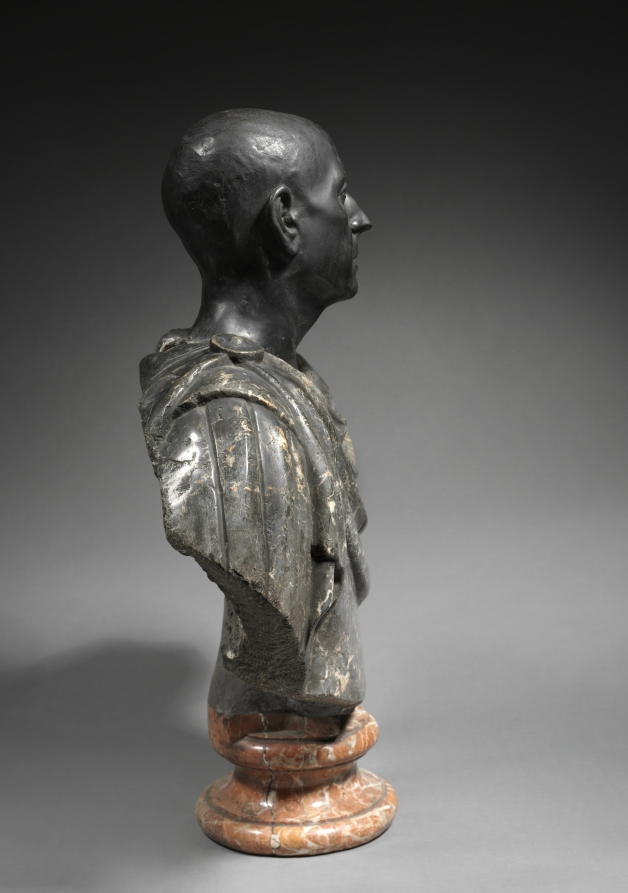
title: Bust of the Ludovisi Cicero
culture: Italy, 17th century or later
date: 1600s or later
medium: marble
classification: Sculpture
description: This work is a variant on the so-called Ludovisi Cicero, a bust in the Uffizi, Florence, that was long-believed to represent the famous Roman orator, but in fact appears to represent an unknown intellectual from the late Roman Republic or early Empire. This interpretation may date as late as the 20th century, and may have been assembled from separate parts.